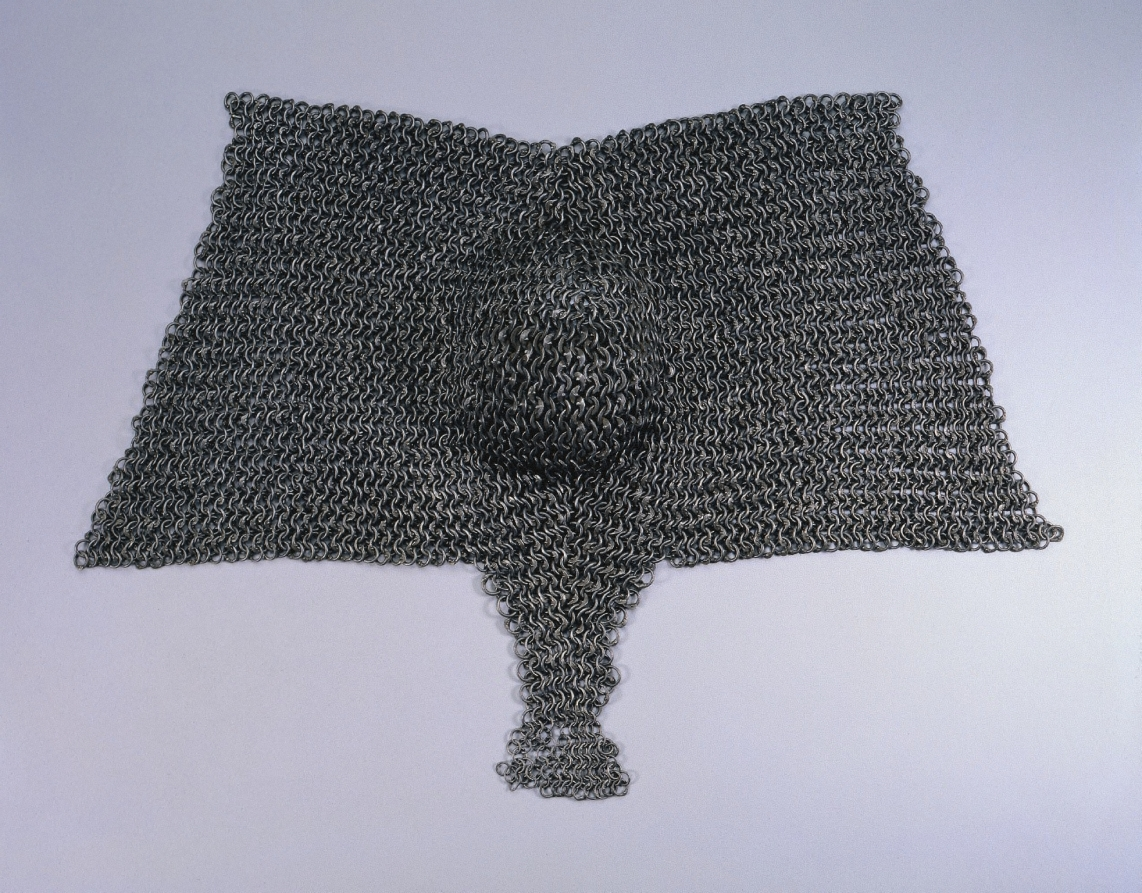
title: Brayette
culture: European, 15th century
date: 1400s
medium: riveted steel rings; strongly reinforced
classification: Arms and Armor